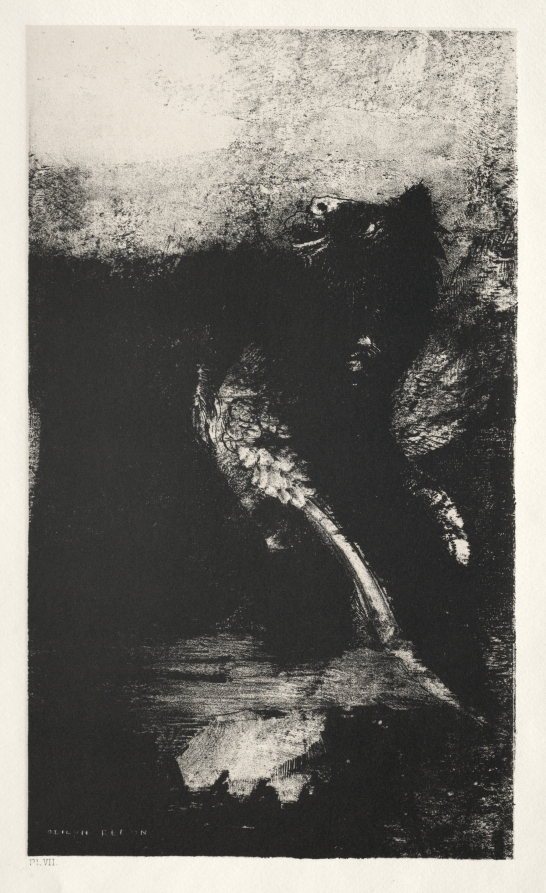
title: The Chimera with Green Eyes Turns, Bays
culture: France, 19th century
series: The Temptation of Saint Anthony (First Series)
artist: Odilon Redon (French, 1840–1916)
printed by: Becquet (French)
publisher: Edmond Deman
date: 1888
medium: lithograph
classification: Print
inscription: printed at lower left, below image: Pl. VII / La chimère aux yeux verts tournoie, aboie.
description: This portfolio is one of three made by Odilon Redon inspired by avant-garde writer Gustave Flaubert’s novel The Temptation of Saint Anthony (1874). Captivated by the book’s fantastical account of moralizing tests encountered by a hermit in the desert, Redon executed charcoal drawings and attempted to evoke that medium’s dense blackness in his lithographs. Based on the text’s darkly imaginative tone rather than its actual content, the works in this series present invented monsters and figures in otherworldly settings with jarring tonal variations. Although Redon felt that the prints effectively translated the surreal universe of his source material, they were largely misunderstood in his own time.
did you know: Publisher Edmond Deman commissioned this portfolio after he saw an 1886 exhibition of Redon's work in Brussels, Belgium.